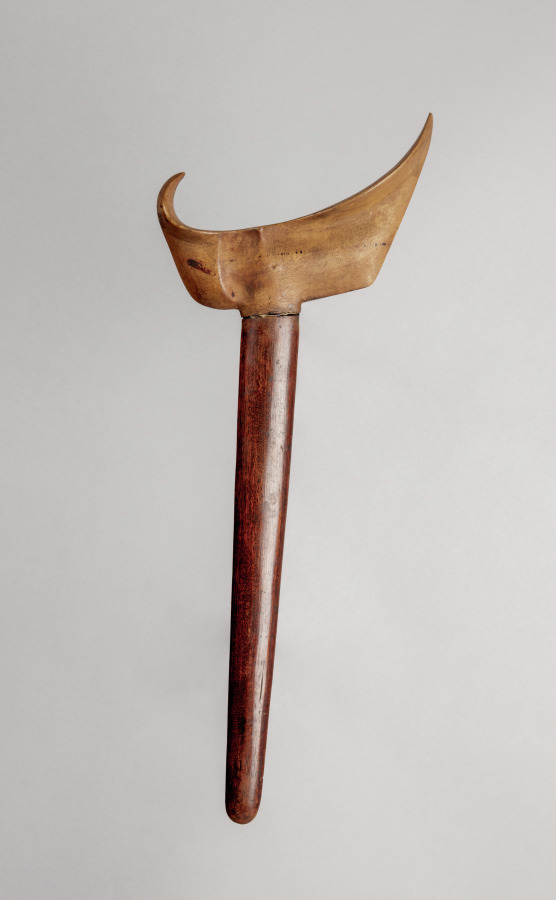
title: Sword (Kris)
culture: Java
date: 1800s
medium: iron with carved wooden handle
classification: Arms and Armor